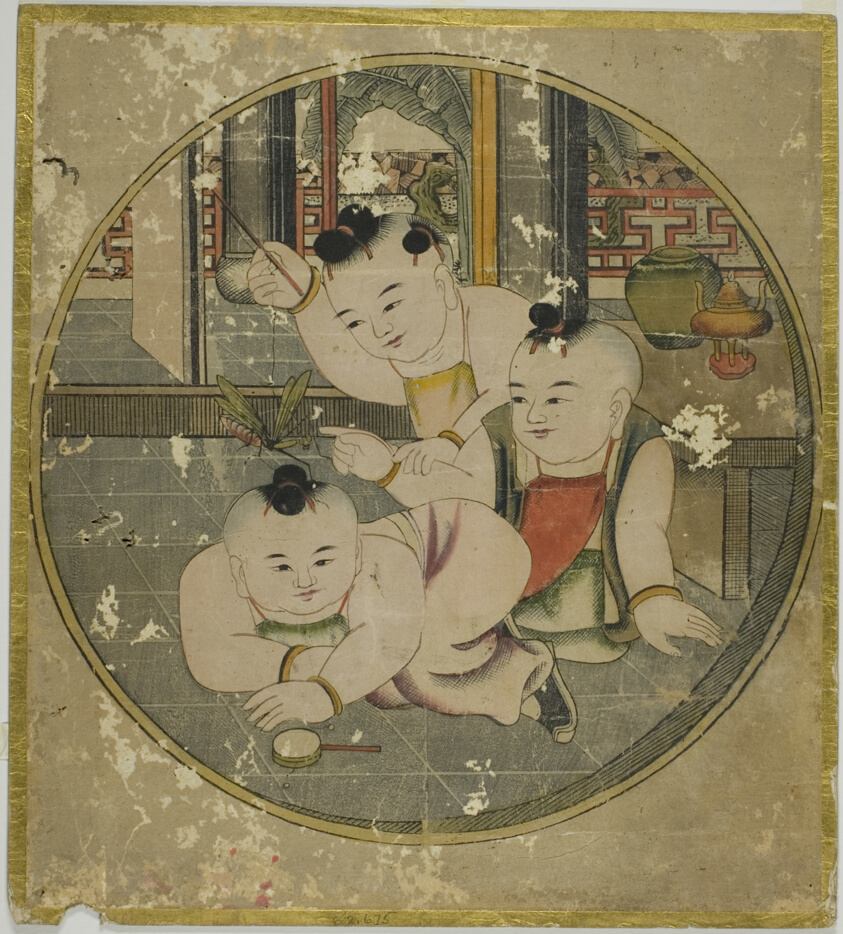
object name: Print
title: Picture of Mantis and Three Children 蟷螂三童図 (Tourou sandou zu)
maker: Unknown Artist; Chinese, date unknown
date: late 18th century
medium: Color woodblock print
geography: Japan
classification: woodblock print; print; asian art